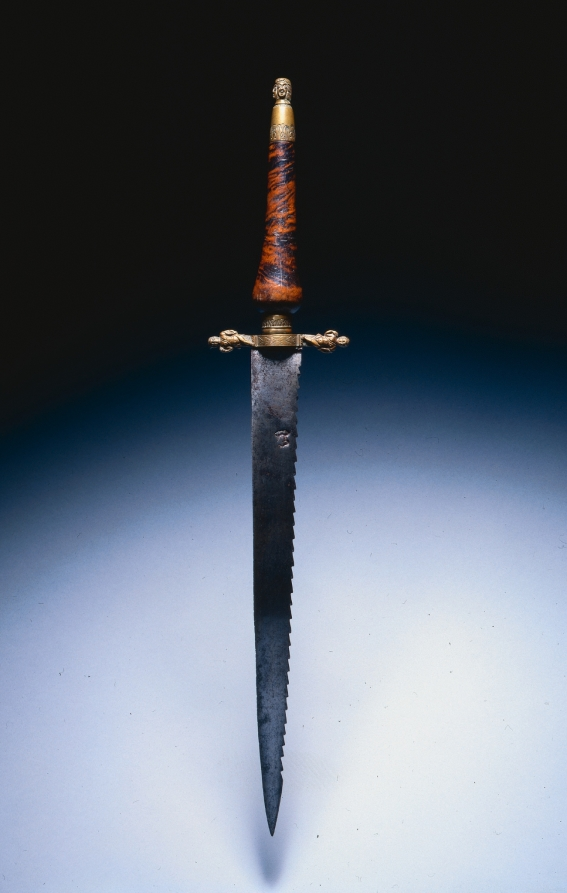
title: Officer's Plug Bayonette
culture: England, 17th century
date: c.1690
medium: steel serrated blade, brass, and wood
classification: Arms and Armor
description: Used increasingly in warfare during the 1600s, the plug bayonet was inserted into the muzzle of a gun to make a weapon with a long shaft. This eventually made the use of pikemen in warfare obsolete as the new musketeer could now continue after having run out of shots.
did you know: The owner's or maker's mark on this blade is unidentified.